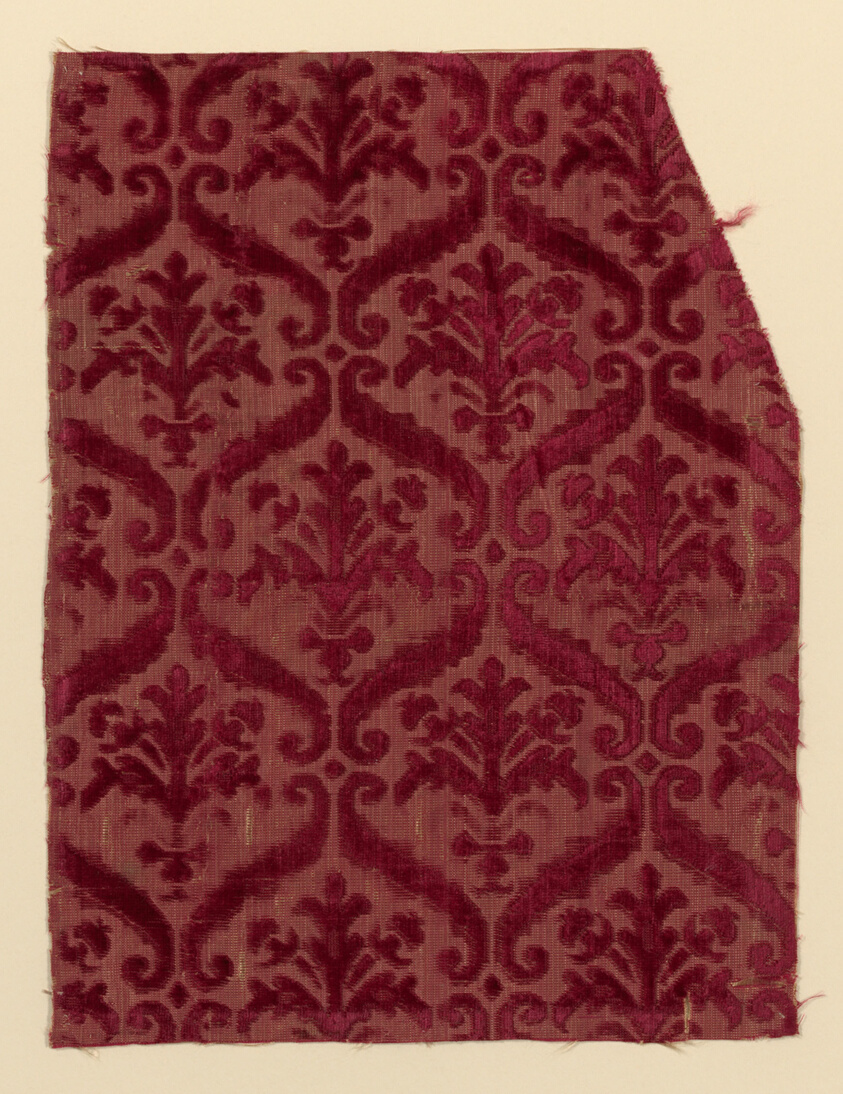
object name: Textile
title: Fragment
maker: Italy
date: 1625/50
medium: cisele voided cloth velvet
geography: Italy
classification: textile; weaving - velvet